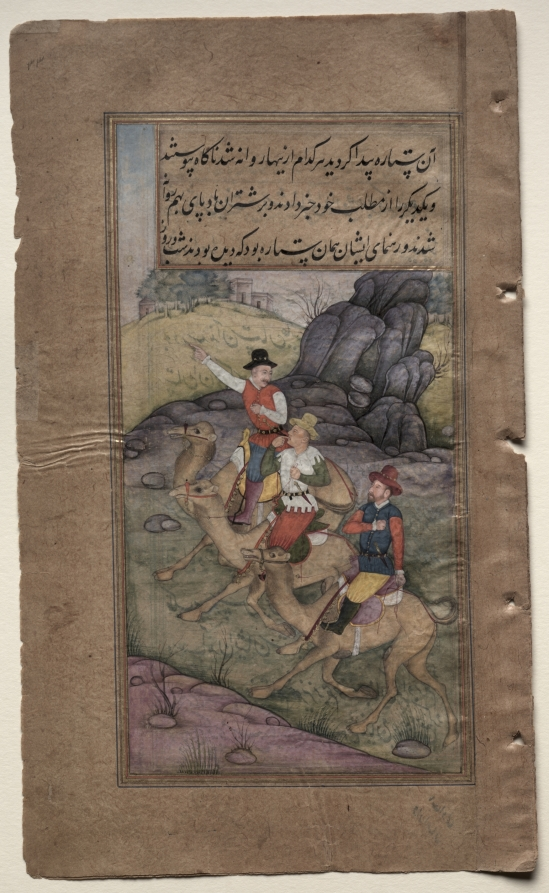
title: The Magi Follow the Star (folio 34 recto), from a Mirror of Holiness (Mir’at al-quds) of Father Jerome Xavier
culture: Mughal India, Allahabad, made for Prince Salim (1569–1627)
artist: attributed to Payag (Indian)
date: 1602–4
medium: Gum tempera, ink, and gold on paper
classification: Manuscript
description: One of the three kings points excitedly at the star at the upper left edge of the page, while another bites the finger of astonishment; the third holds his fist over his heart. They are all dressed like Portuguese merchants, but they ride camels associated with their homeland in Arabia, as specified in the text. The Westerners whom Mughals would have seen, besides priests, were mainly merchants from the Portuguese port of Goa on India’s western coast. They regularly visited Akbar to negotiate trade agreements, so they served as the primary visual model for all nonclerical Europeans. The artists who produced this manuscript worked for Akbar before joining Prince Salim at his rebel court in Allahabad.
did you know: At the breakaway court of Prince Salim in Allahabad, high-quality materials were not as plentiful as in the imperial capital. The paper is brittle and has browned excessively, and the paint films are relatively thin; here the text from the verso shows through the lightly colored background.